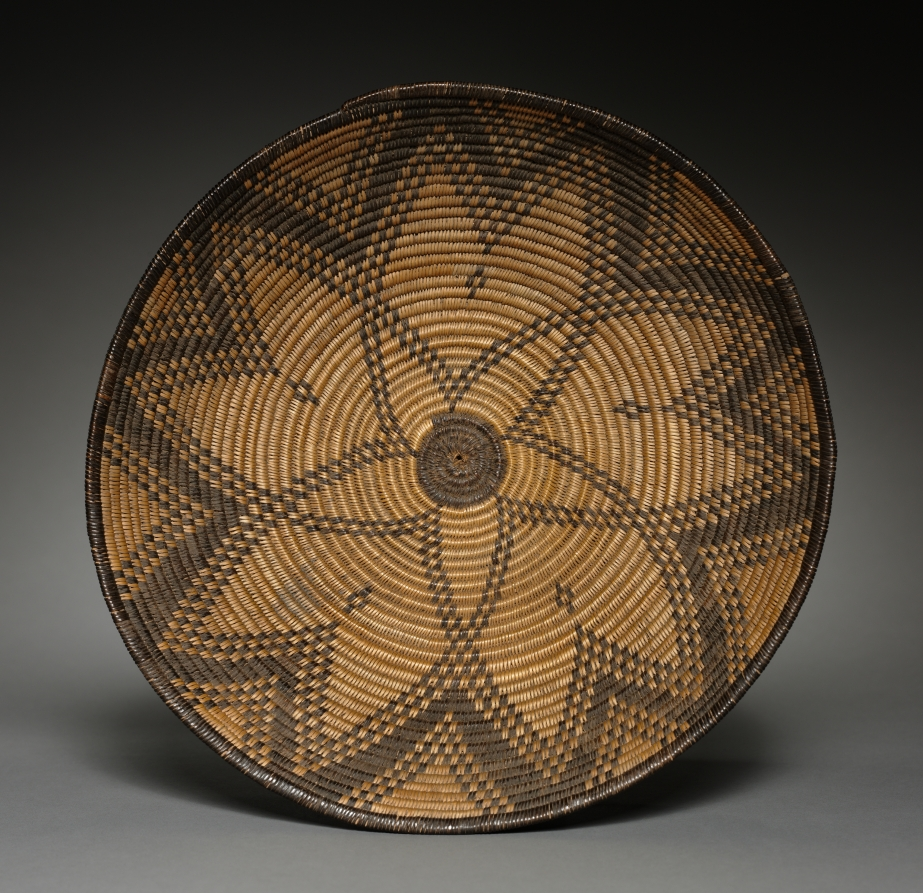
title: Tray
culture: Southwest, Apache, Western or Yavapao Apache, 20th century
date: c 1900–1939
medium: Devil's claw, Willow; Coiled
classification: Basketry